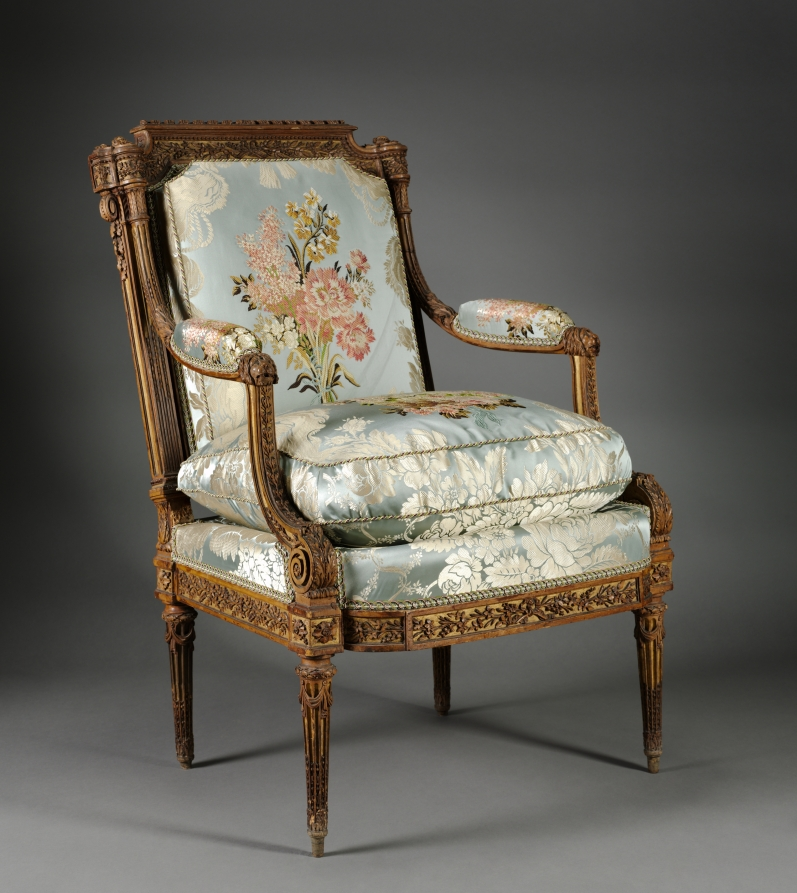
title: Armchair (Fauteuil) (1 of 2)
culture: France, 18th century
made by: Nicolas-Denis Delaisement (French)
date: c. 1785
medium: boxwood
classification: Furniture and woodwork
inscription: signed on back of frame of seat underneath: Delaisement with inverted "s."